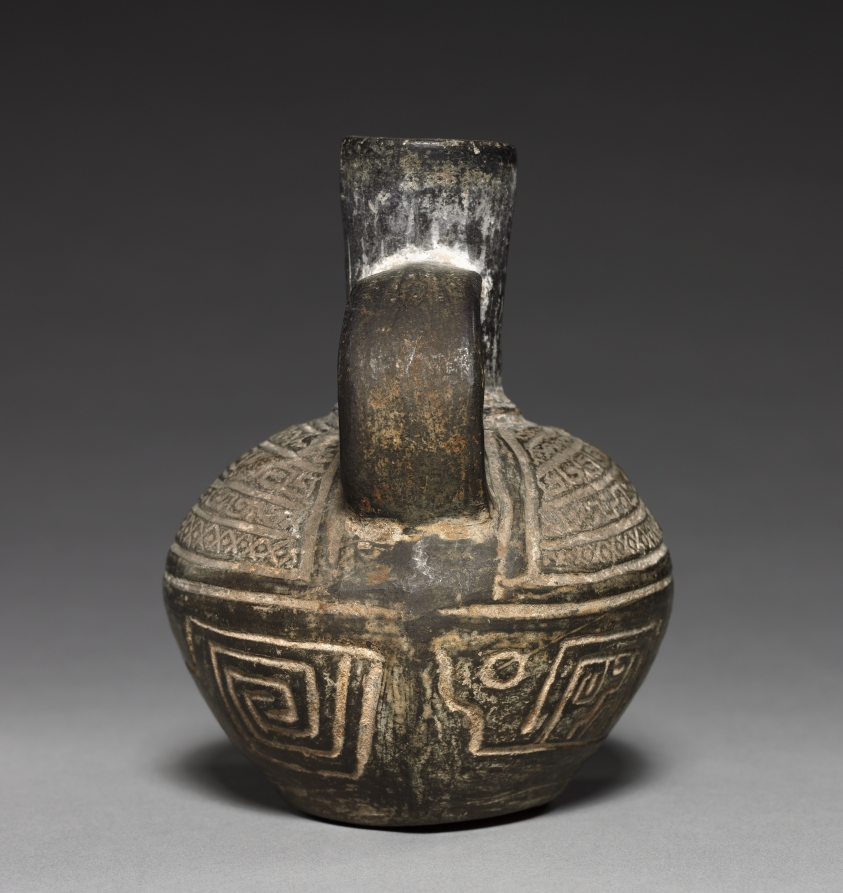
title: Bottle Vase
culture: Peru, Chimú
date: 1200–1400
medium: black ware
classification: Ceramic